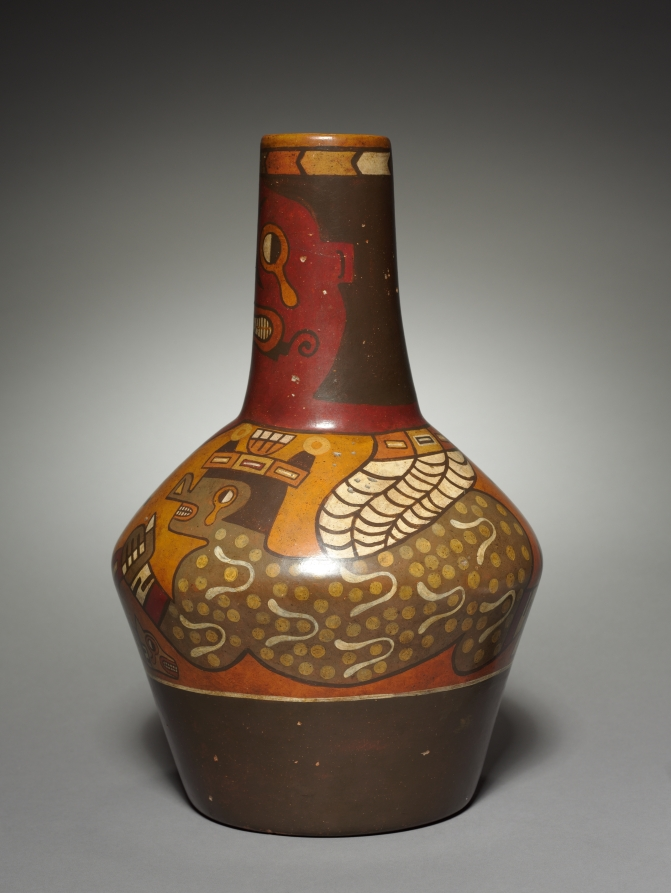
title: Vessel (modern version of a Wari-style vessel)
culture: Peru, modern, 20th century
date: before 1955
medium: pottery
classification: Forgery